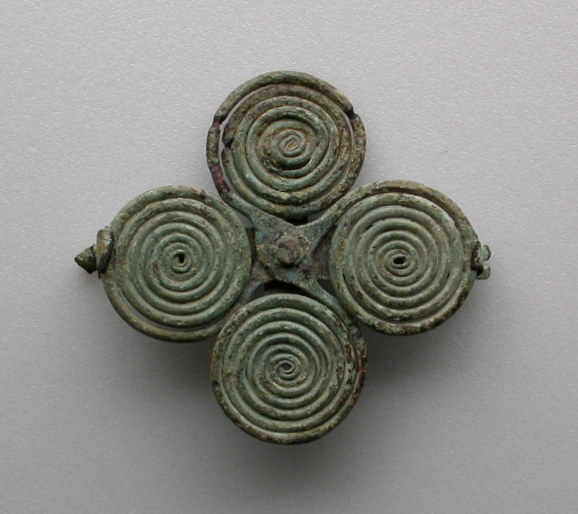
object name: Costume and Accessories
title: Quatrefoil spiral fibula (garment pin)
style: etruscan, ancient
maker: Etruscan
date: 7th century BCE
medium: Bronze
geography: Etruria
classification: fibula; bronze; metal; jewelry; ancient art; costume